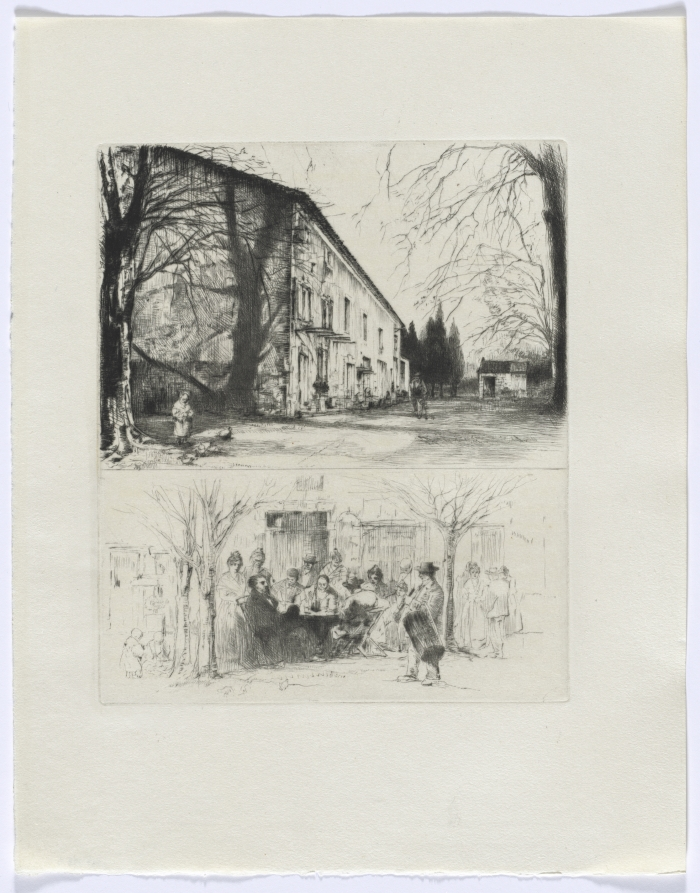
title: Frédéric Mistral: Mémoires et Recits by Frédéric Mistral: street scene and people at outdoor table (insert after p. 24)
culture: France, 20th century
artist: Auguste Brouet (French, 1872–1941)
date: 1937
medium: etchings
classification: Portfolio